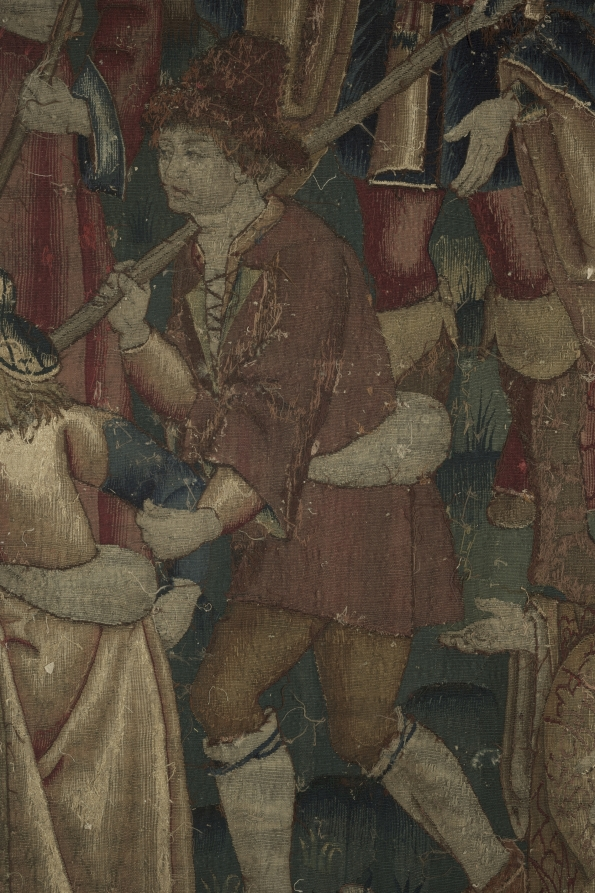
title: Shepherds in a Round Dance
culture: Netherlands, early 16th century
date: around 1500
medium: Wool and silk: tapestry weave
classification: Tapestry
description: Late medieval tapestries often use a limited yet contrasting color palette to portray stylized images. The expressions of these figures, for example, are conveyed more by their postures than by their faces. Four shepherds and shepherdesses join hands and dance to the music of a bagpiper at the far right, while a lord and two ladies on the left look on. A dog and sheep amid blossoming plants and trees contribute to the festive pastoral scene in front of a castle.